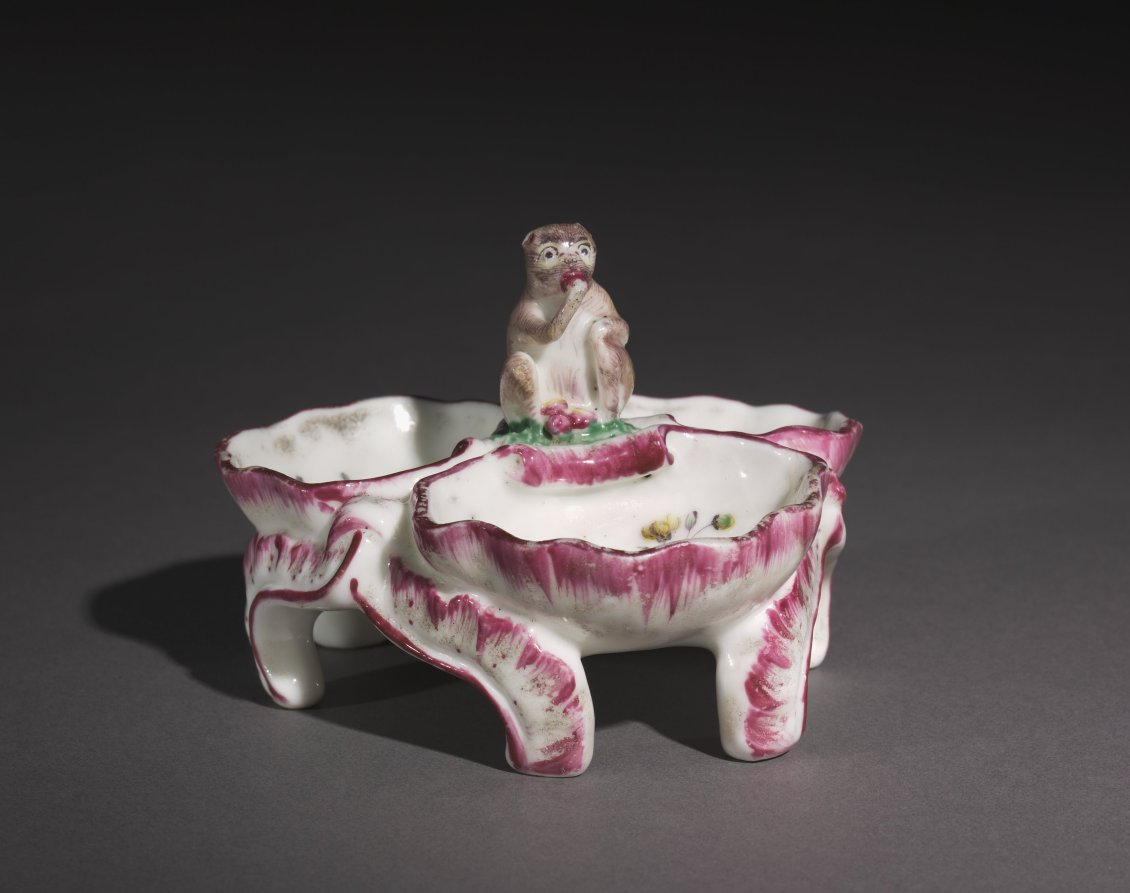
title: Triple Salt Cellar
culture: France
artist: Mennecy Factory (French)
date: c. 1765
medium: Soft-paste porcelain with enamel decoration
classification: Ceramic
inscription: [Incised]: DV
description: In 16th-century France, salt was costly and often displayed in exceptionally designed and decorated salt cellars that reinforced wealth and status. Still elegantly designed and ornamented, this triple salt cellar is small, a result of the decreasing decorative and symbolic importance of salt in the latter half of the 1700s. With its floral decoration and whimsical monkey-shaped handle, this object’s design is characteristic of the Rococo style.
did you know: This triple salt cellar might have held a variety of ingredients including powdered spices, celery or garlic salt.